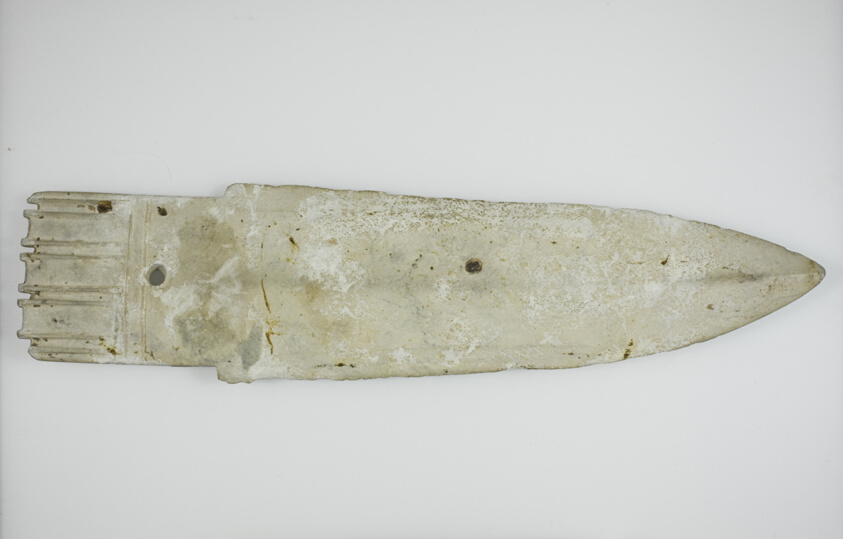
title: Dagger-Axe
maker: China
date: Shang dynasty (c. 1600–1046 B.C.)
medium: Jade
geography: China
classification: jade; asian art